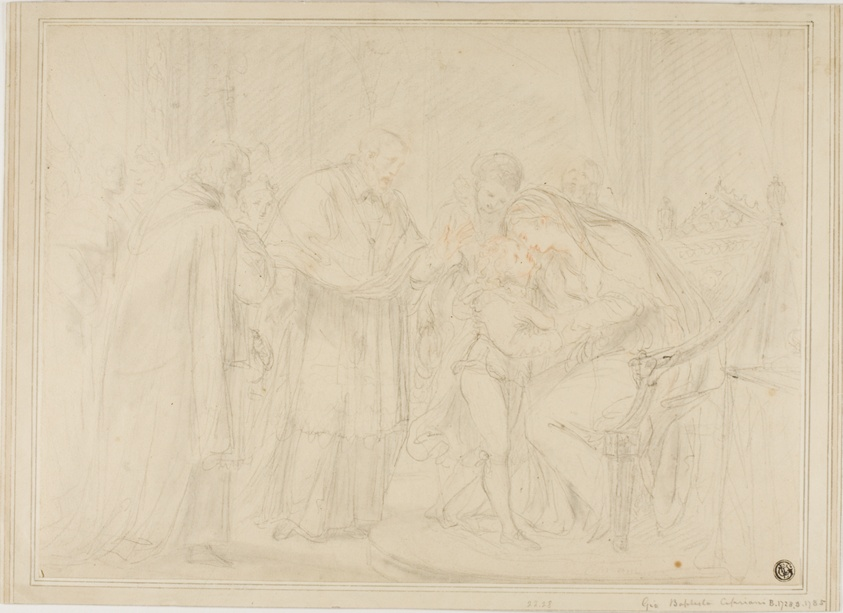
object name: Drawing and Watercolor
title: Queen of Edward IV parting with the Duke of York by Order of Richard III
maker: Attributed to Giovanni Battista Cipriani; Italian, 1727-1785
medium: Black chalk with touches of red chalk on cream wove paper, laid down on cream wove paper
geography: Italy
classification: graphite; drawings (visual works); prints and drawing